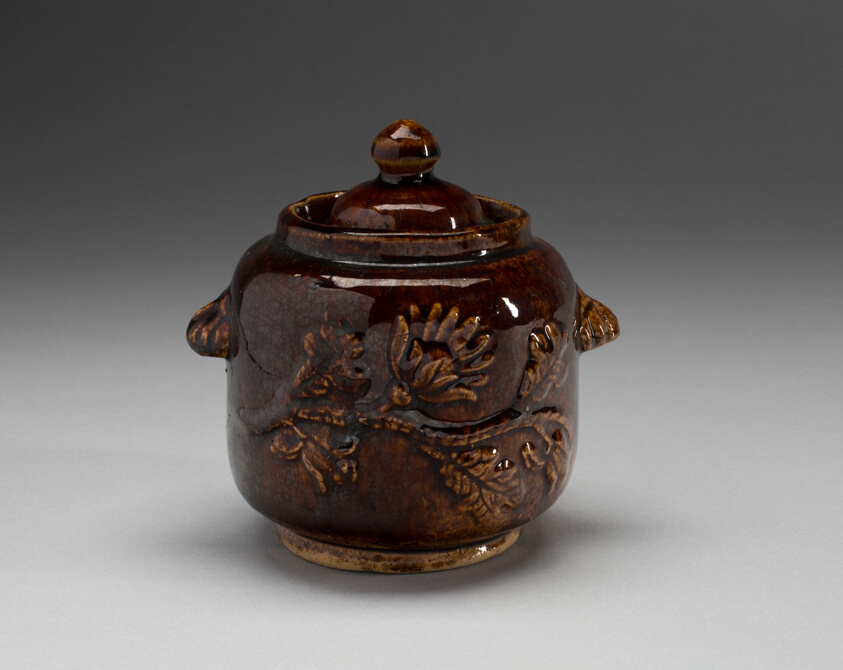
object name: Decorative Arts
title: Sugar Bowl with Cover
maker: Artist unknown (American, 19th century); Possibly New England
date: 1840–90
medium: Earthenware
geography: Swinton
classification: sugar bowl; earthenware; ceramics; american decorative arts; american arts; decorative arts